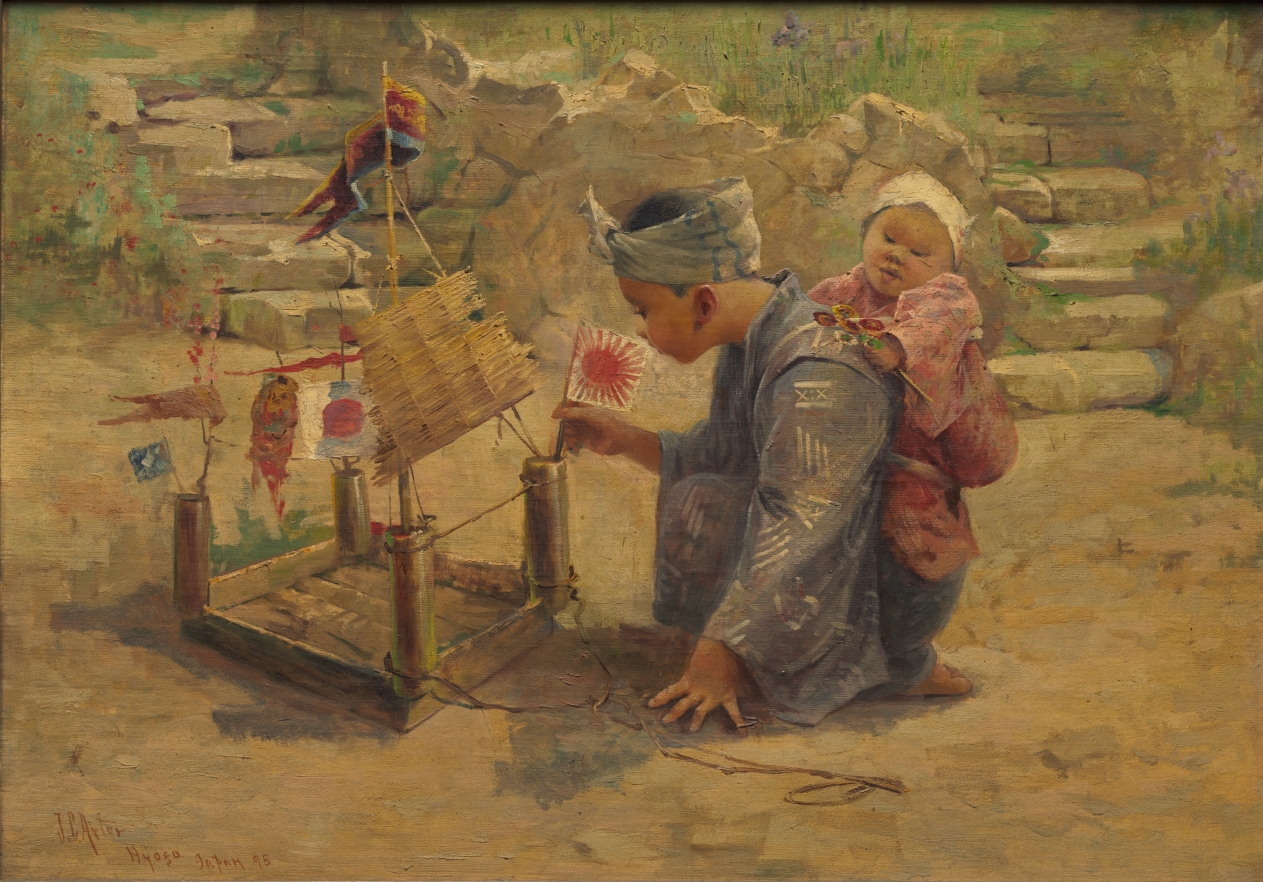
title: Japanese Boy Building a Man-of-War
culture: America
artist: J. C. Arter (American, 1859–1923)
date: 1895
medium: oil on canvas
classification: Painting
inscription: signed lower left: J. C. Arter / Hyozo / Japan 95